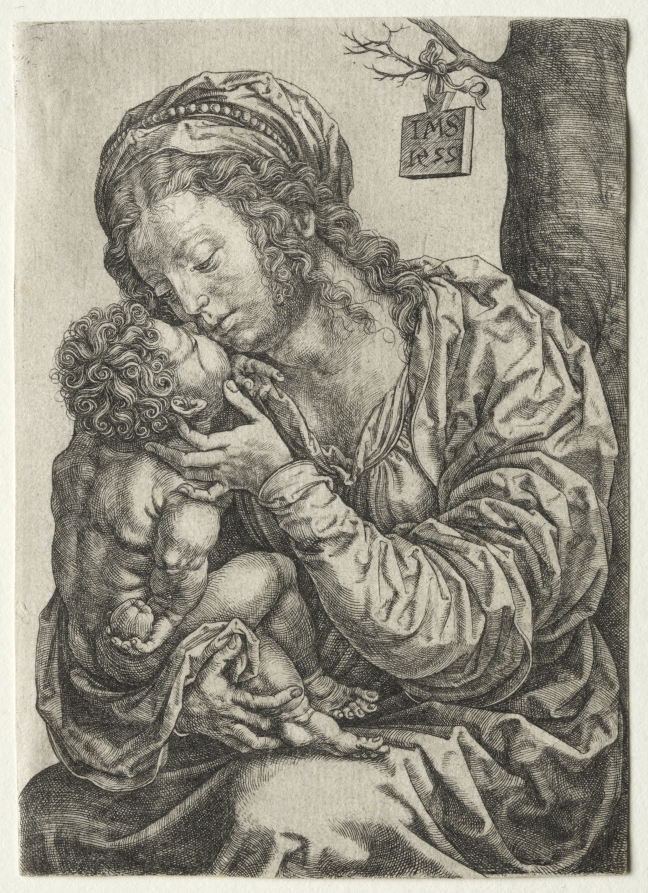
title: The Virgin Seated at the Foot of a Tree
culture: Flanders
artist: Jan Gossaert (Flemish, c. 1475/78–1532)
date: 1522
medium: engraving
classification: Print